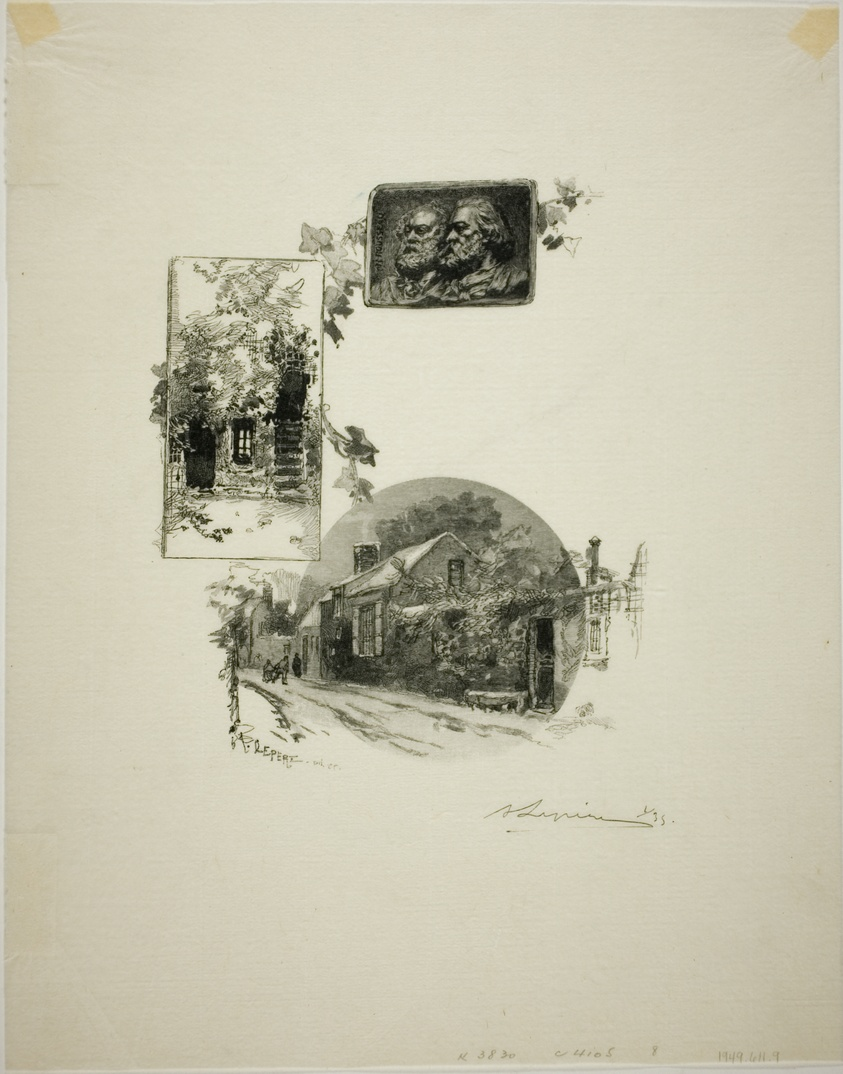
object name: Print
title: Entry to Rousseau's Studio and the Millet Home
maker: Louis Auguste Lepère (French, 1849-1918); published by A. Desmoulins (French, active c. 1908-1910)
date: published 1908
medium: Wood engraving in black on cream laid Japanese paper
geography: France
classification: wood engraving; print; prints and drawing